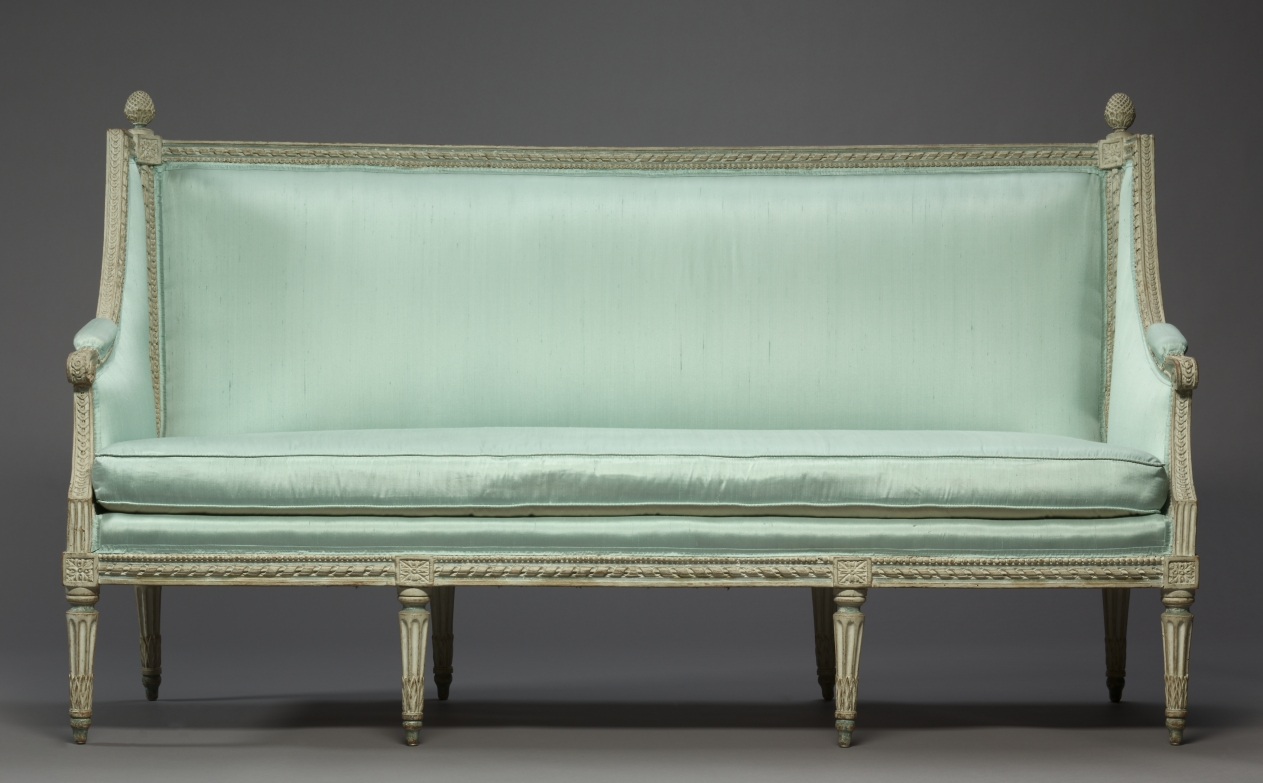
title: Settee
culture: France, 18th century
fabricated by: Philippe-Joseph Pluvinet (French, 1793)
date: c. 1780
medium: painted wood and upholstery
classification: Furniture and woodwork